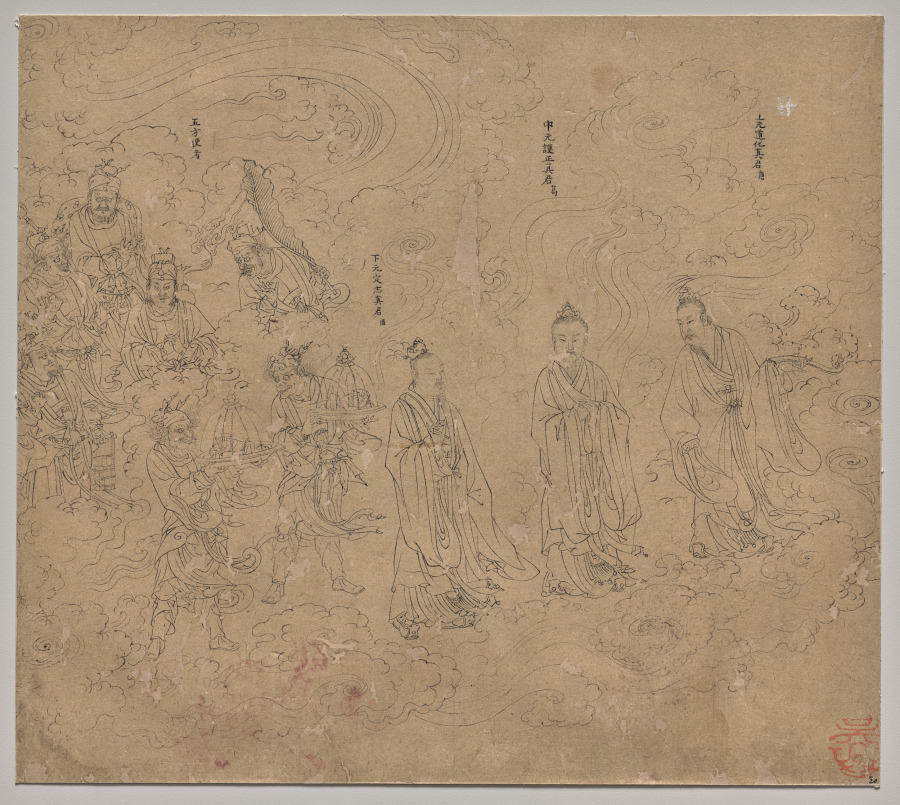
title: Album of Daoist and Buddhist Themes: Procession of Daoist Deities: Leaf 20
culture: China, Southern Song dynasty (1127-1279)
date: 1200s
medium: Album, ink on paper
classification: Painting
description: This section of the Daoist pantheon portrays the three True Lords 真君: Tang Hong 唐宏, Ge Yong 真君, and Zhou Bin 周斌, who served as censors during their mortal years. Their loyal attendants help subjugate the figures at the left and are also compassionate to the common people.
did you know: Two attendants offer the True Lords covered plates, each containing a miniature reclining figure.